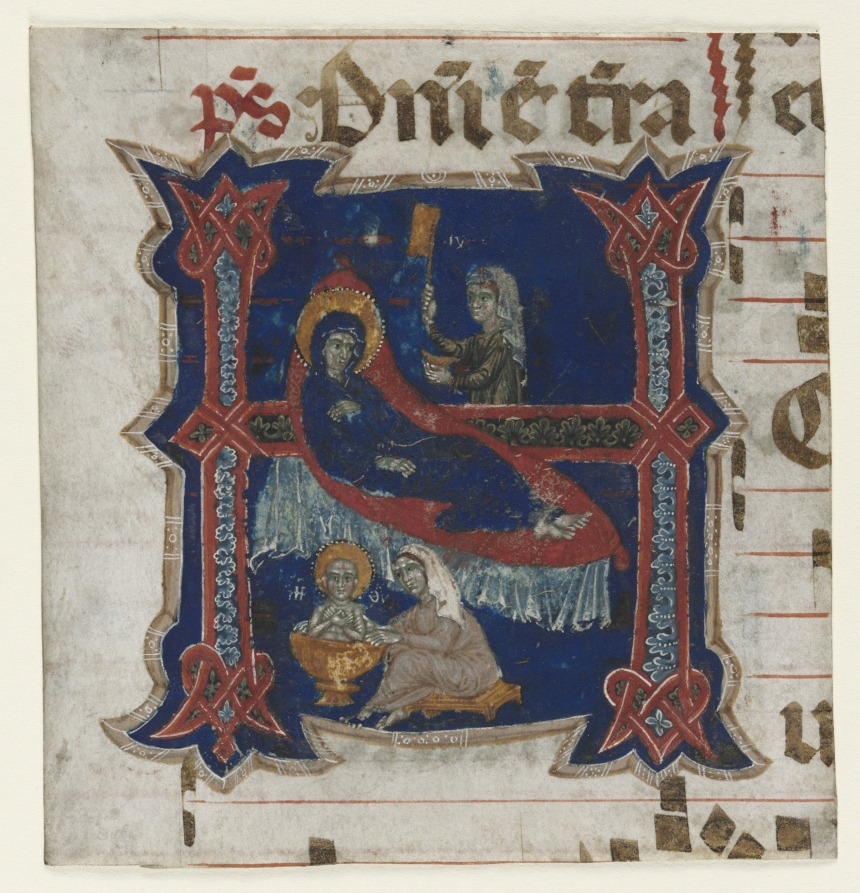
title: Fragment of a Choir Book with Historiated Initial (H): Birth of the Virgin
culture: Southern Italy, 13th century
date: 1200s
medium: ink, tempera, and gold on parchment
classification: Manuscript